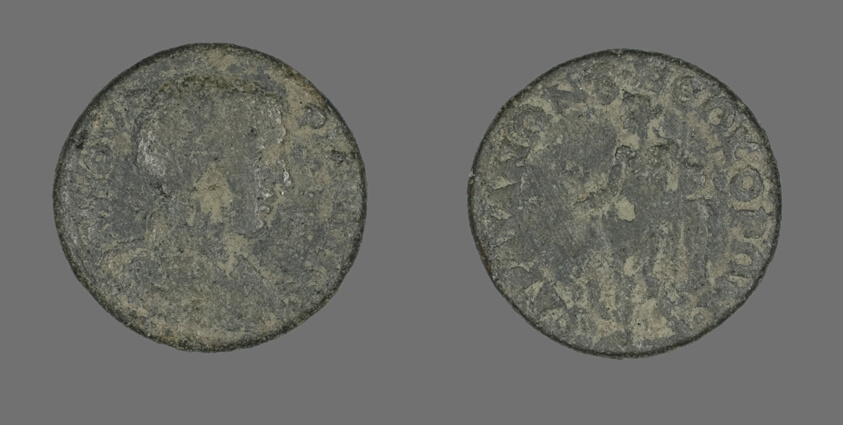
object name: Coin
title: Coin Portraying King Philip II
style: roman (ancient, style or period)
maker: Roman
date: 244-249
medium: Bronze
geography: Roman Empire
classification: coin; ancient art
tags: king, portrait